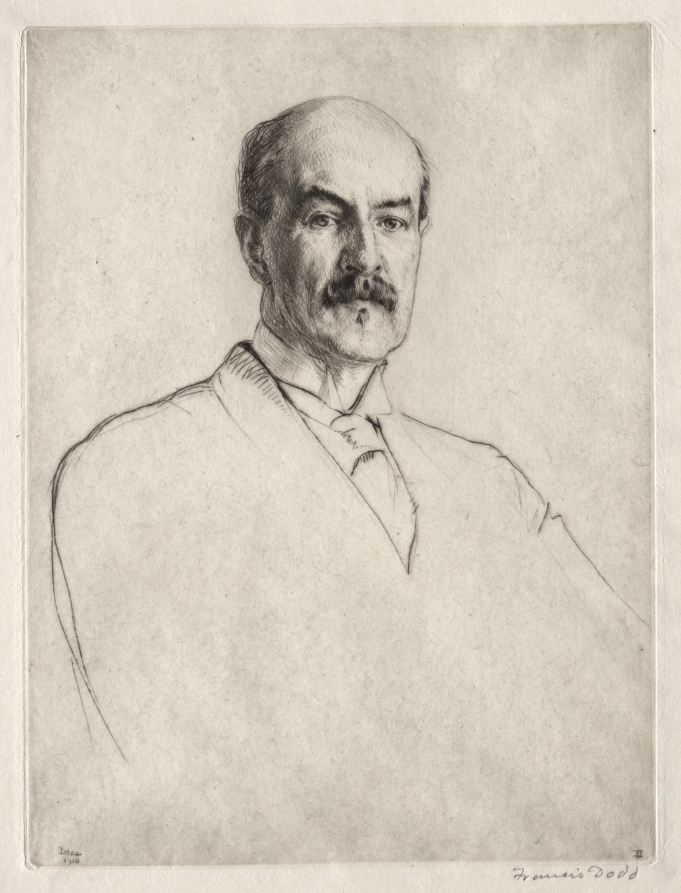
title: Professor Oliver Elton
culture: England, 20th century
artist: Francis Dodd (British, 1874–1949)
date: 1916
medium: drypoint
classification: Print